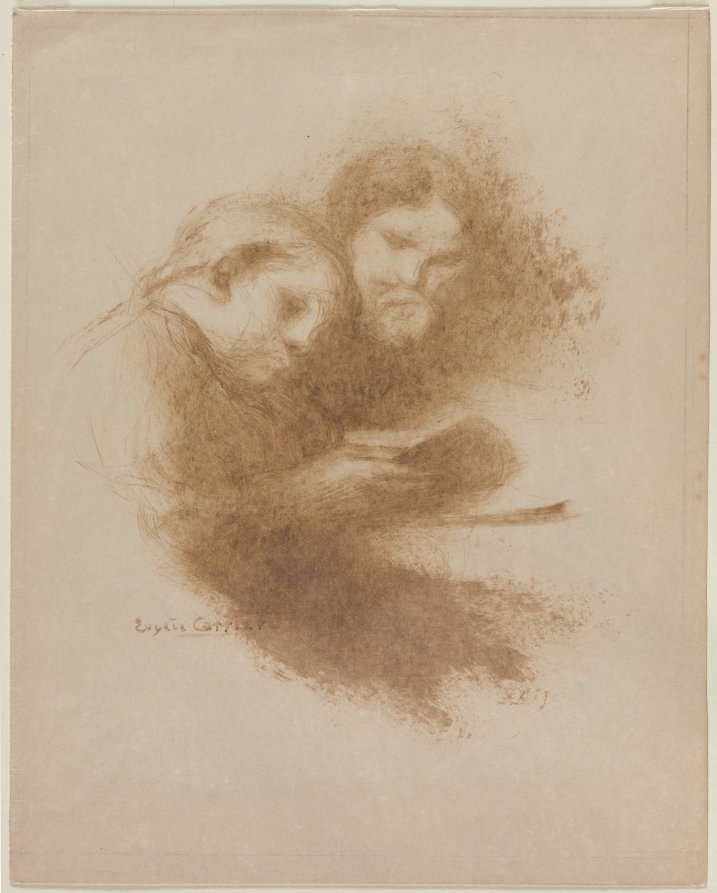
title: Reading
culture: France, 19th century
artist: Eugène Carrière (French, 1849–1906)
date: c. 1875–1900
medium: brush and brown ink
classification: Drawing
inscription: Signed, lower left, in brown ink: Eugène Carrière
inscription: verso, center right, in graphite: Dessin original / d' Eugène Carrière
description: Eugène Carrière was known for the evocative, hazy brushwork he used throughout various media. Executed in his signature style, this drawing likely depicts the artist's family studying a book together. Carrière favored such intimate domestic scenes, using ethereal ochre marks to allow his subjects to blend into their surroundings.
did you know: Eugène Carrière's close friend, the sculptor Auguste Rodin, once said of the artist that he "sculpts in shadow."